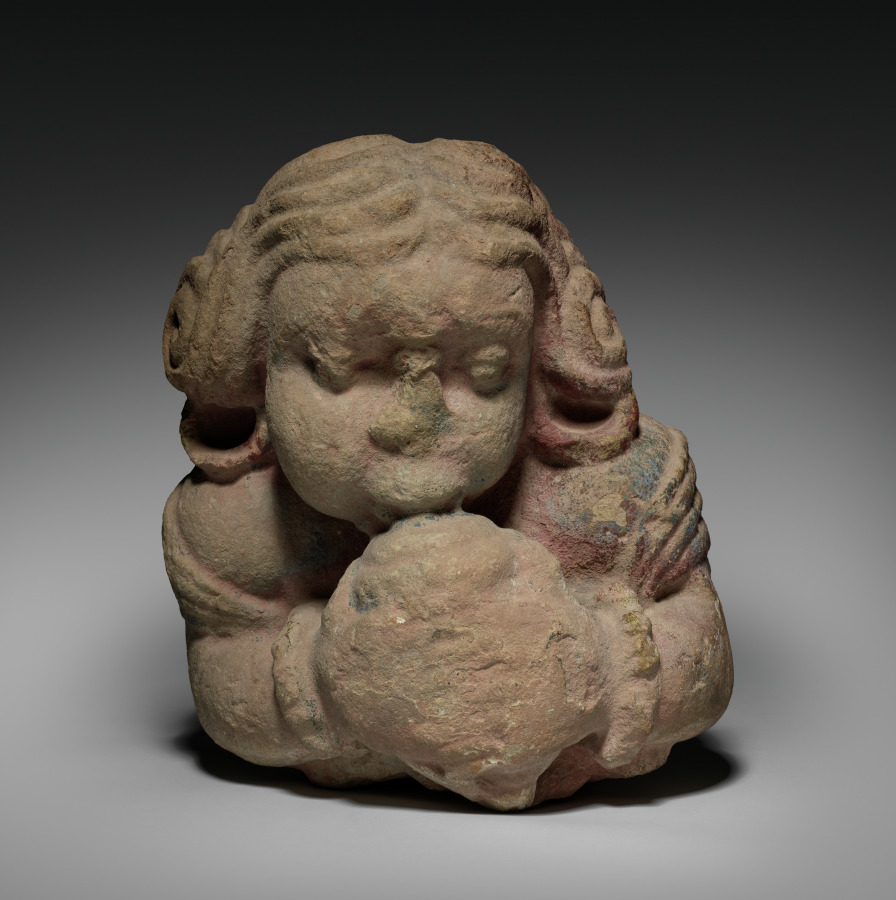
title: Shivagana Blowing Conch Shell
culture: India, Sarnath, Gupta Period, 5th Century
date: c. 400s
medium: stone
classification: Sculpture